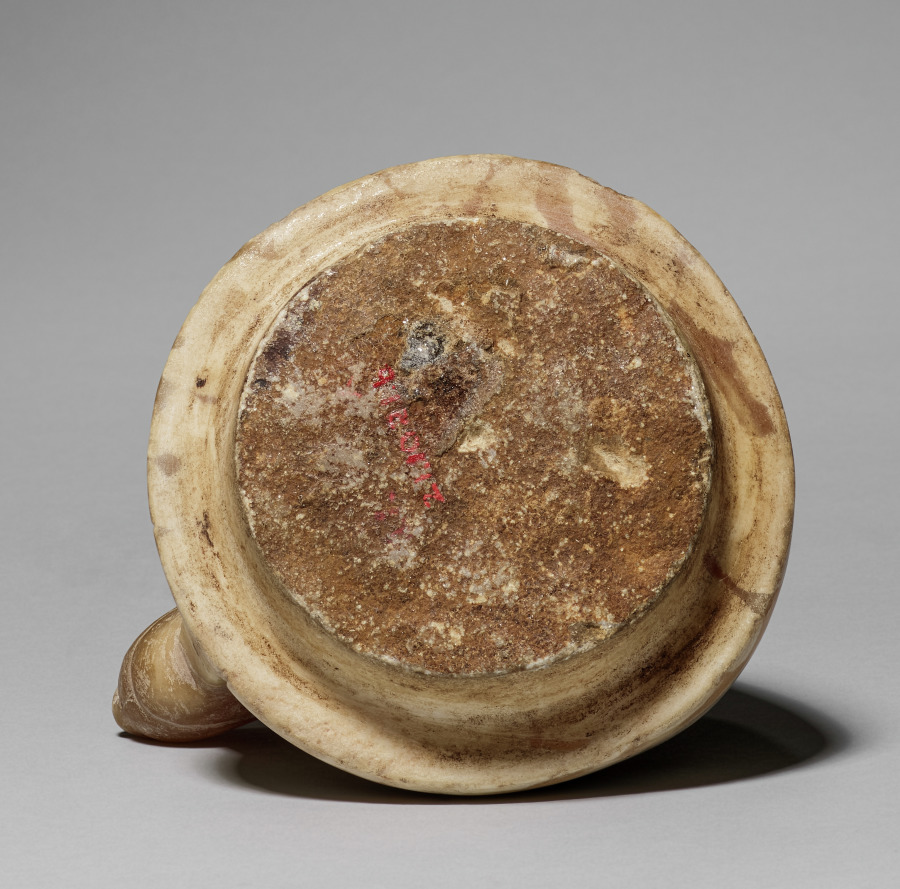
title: Canopic Jar with Jackal's Head (lid)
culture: Egypt, Late period (715–332 BCE), Dynasty 26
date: 664–525 BCE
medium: travertine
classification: Funerary Equipment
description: In the process of mummification, the liver, lungs, stomach, and intestines were removed, separately embalmed, and stored in specialized jars known as canopic jars (after a sailor in Greek mythology, who died at the town of Canopus in the Nile Delta and was worshipped there in the form of a human-headed jar). Each organ was identified with one of four funerary deities collectively known as the Sons of Horus: the liver with Imsety (man's head), the lungs with Hapy (baboon's head), the stomach with Duamutef (jackal's head), and the intestines with Qebehsenuef (falcon's head). It was their duty to protect the deceased and restore to him his body parts in the hereafter.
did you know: This jar is made of travertine stone-- subtle in color and with a captivating natural pattern-- with hieroglyphics carved on the front. Such jars were used to hold internal organs of the deceased and to preserve them for the afterlife.